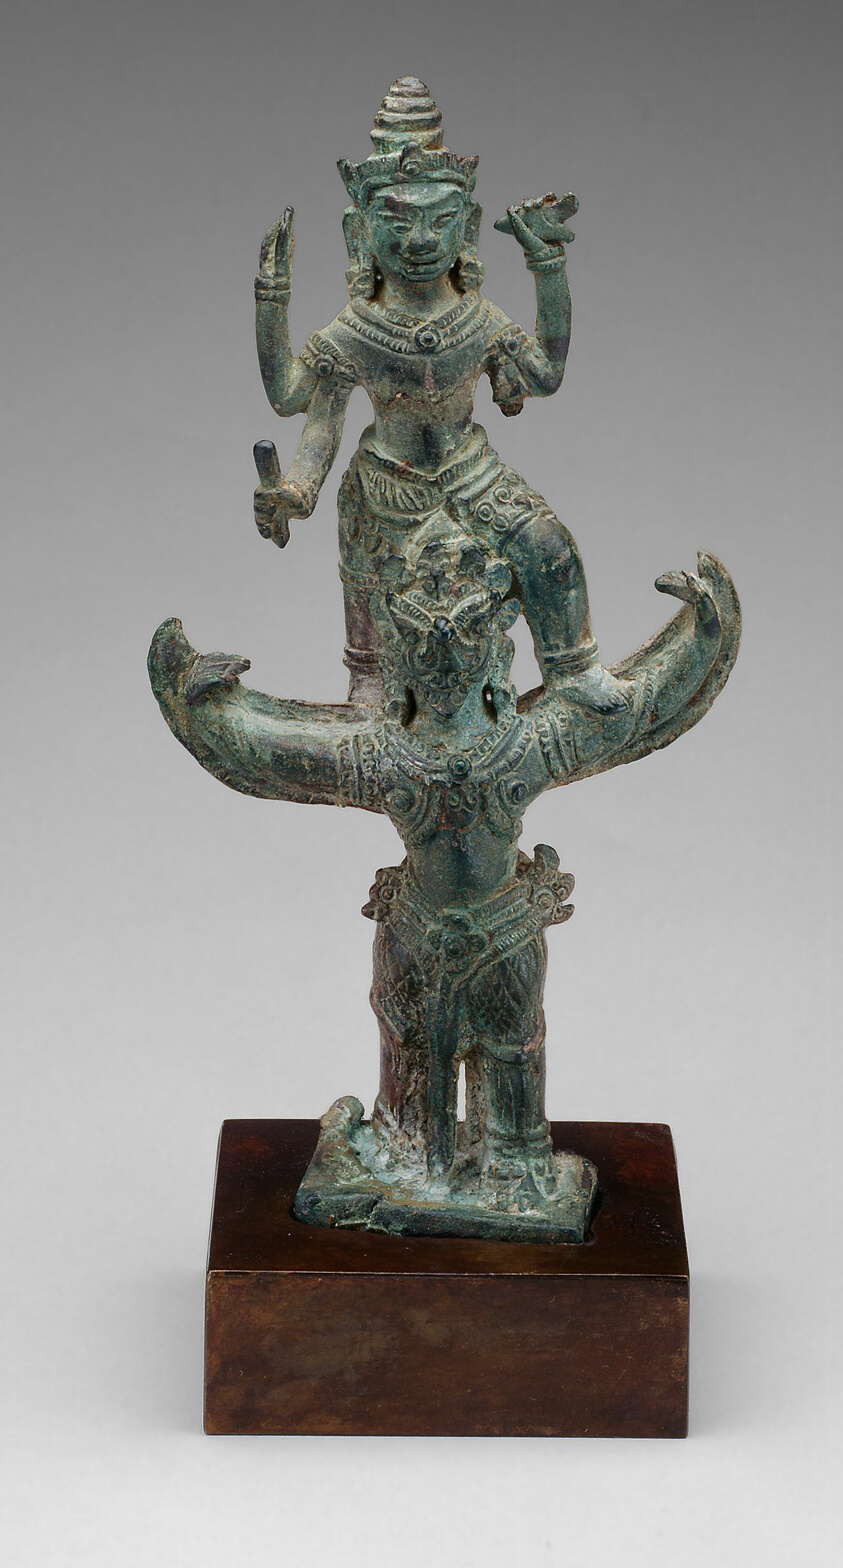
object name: Sculpture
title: God Vishnu on His Mount, Garuda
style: Southeast Asian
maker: Cambodia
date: Angkor period, 12th century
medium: Bronze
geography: Cambodia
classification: bronze; metal; sculpture; asian art